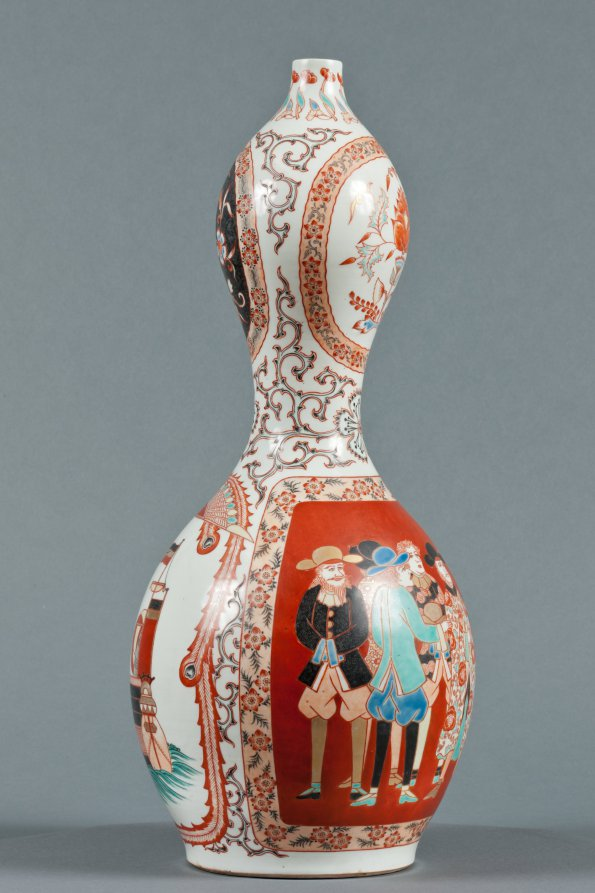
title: Bottle with Western Ships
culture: Japan, Edo period (1615–1868)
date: c. 1800–1868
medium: Porcelain with decoration in colored enamels and underglaze blue, overglaze enamels, and gold (Hizen ware, Arita type)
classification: Ceramic